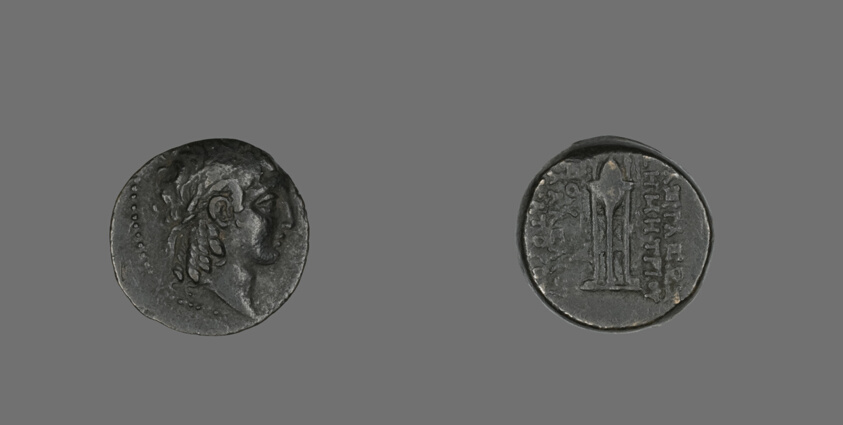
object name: Coin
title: Coin Depicting the God Apollo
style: greek, ancient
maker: Greek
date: 146-139 BCE, issued by of Demetrius II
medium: Bronze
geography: Ancient Greece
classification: coin; ancient art; struck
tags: gods (deities)